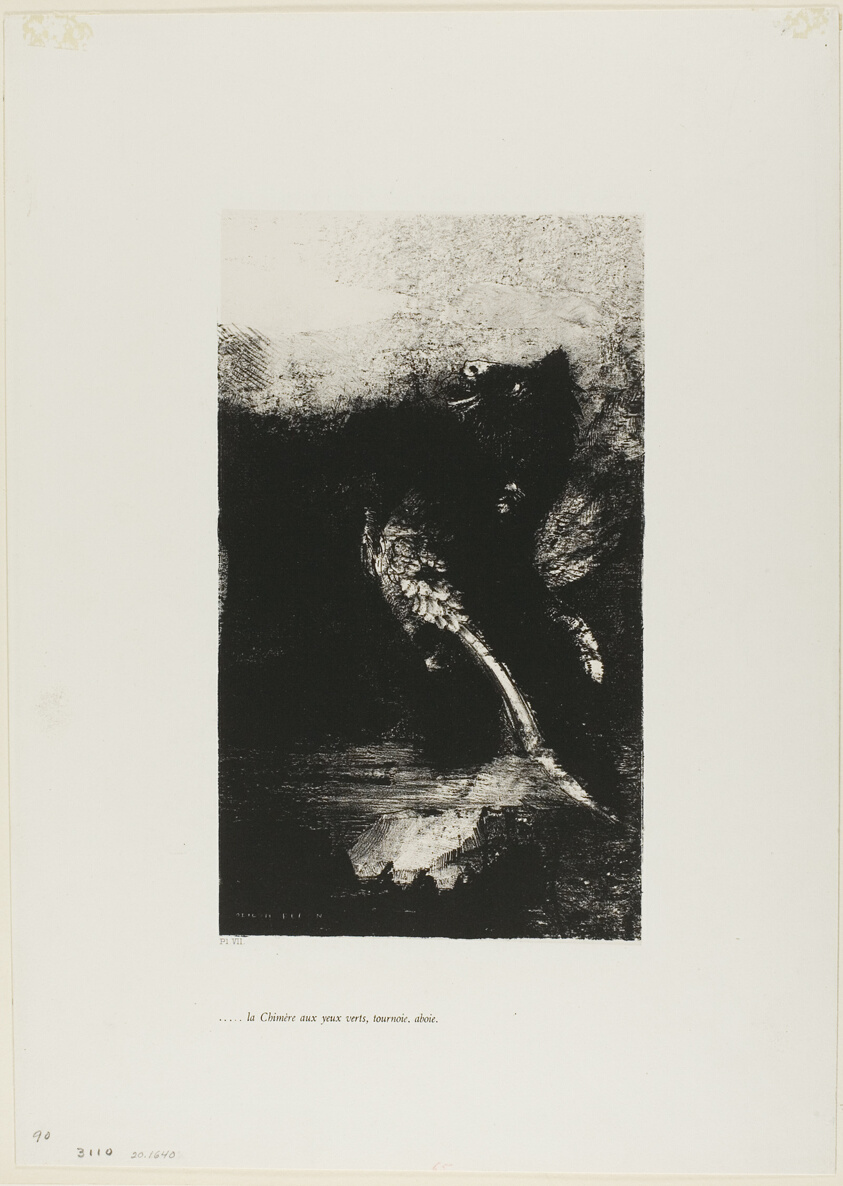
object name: Print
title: The Chimera with Green eyes Turns, Bays, plate 7 from The Temptation of Saint Anthony (1st series)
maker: Odilon Redon (French, 1840-1916)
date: 1888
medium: Lithograph in black on ivory China paper laid down on white wove paper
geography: France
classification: lithograph; print; prints and drawing; paper